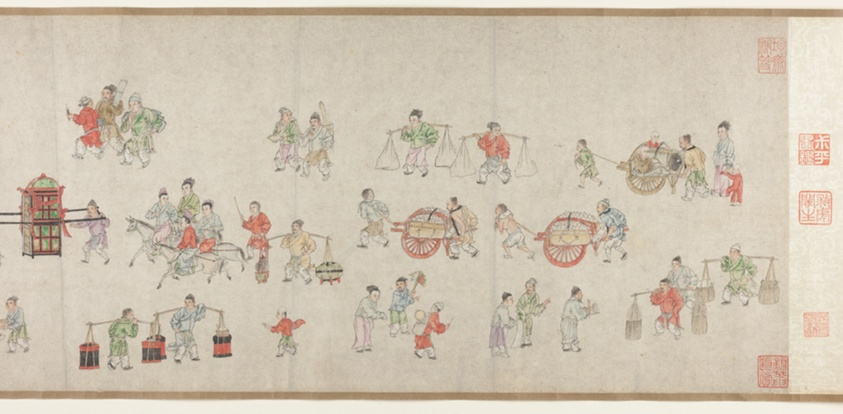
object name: Painting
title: Street Scenes in Times of Peace 太平風會圖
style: Chinese (culture or style)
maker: Zhu Yu (Zhu Junbi) 朱玉（朱君璧）; Chinese, 1293-1365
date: Yuan dynasty (1279–1368), 14th century 元朝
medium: Handscroll; ink and colors on paper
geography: China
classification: handscroll; painting; asian art